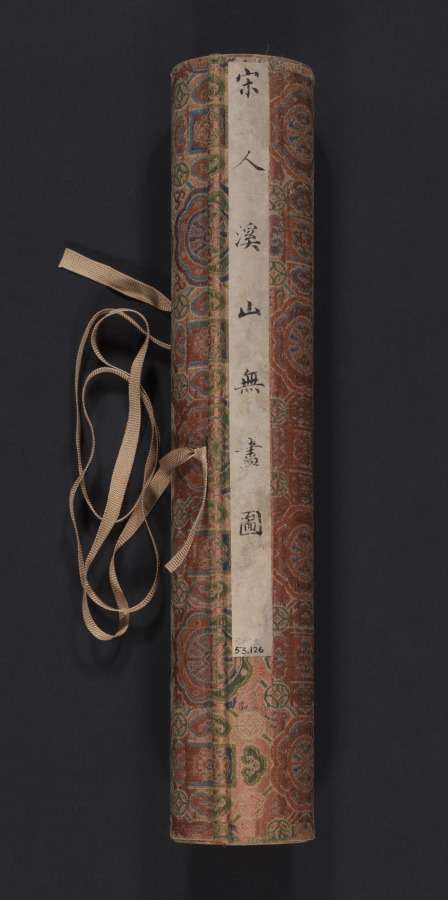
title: Streams and Mountains without End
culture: China, late Northern Song dynasty (960-1127) - Jin dynasty (1115-1234)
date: 1100–1150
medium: handscroll; ink and slight color on silk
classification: Painting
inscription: 9 colophons and 48 seals: 1 colophon, dated 1205, of Wang Wenwei 王文蔚 (dates unknown); 1 colophon, dated 1205, of Li Hui 李惠 (dates unknown); 1 colophon of Weiluo Tian Xie 蔚羅田獬 (dates unknown); 1 colophon, dated 1214, of He Yan 何言 (dates unknown); 1 colophon, dated 1326, of Cao Yuanyong 曹元用 (d. 1329) 1 colophon, dated 1332, of Kangli Zishan 康里子山 (Naonao; 1295-1345); 1 colophon, dated 1336, of Liu Zai 劉載. (dates unknown); 1 colophon, dated 1380, and 4 seals of Yang Mao 楊懋 (1300-after 1380); 4 seals of the Hou family (ca. 1340); 1 colophon of Wang Duo 王鐸 (1592-1652); 4 seals of Zhang Bingqian 張秉乾 (juren of 1729); 8 seals of Liang Qingbiao 梁清標 (1620-1691); 2 seals of the Qianlong emperor (r. 1736-95); 4 seals of the Jiaqing emperor (r. 1796-1820); 3 seals of the Xuantong emperor (r. 1909-11); 2 seals of Ye Gongchuo 葉恭綽 (1881-1968); 17 seals of Zhang Yuan 張爰 (Zhang Daqian 張大千, 1899-1983).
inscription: Colophon 1. Wang Wenwei 王文蔚. Dated third month and third day, 1205, under the reign of Zhangzong of the Jin dynasty. 造物元無心，山川秀氣聚。畫手亦無盡，各出新意度。 誰將妙林泉，淡墨寫縑素。重巒疊嶂間，三兩人家住。 茅舍隔素籬，小橋通細路。溪上數葉舟，雅有物外趣。 嵓崦藏招提，依稀認窗戶。山色四時宜，雲煙自朝暮。 不知塵世中，此景在何處。收拾買山錢，投老好歸去。 泰和乙丑三月三日平原王文蔚謹再拜，書于河東縣署之野趣堂。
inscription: Colophon 2. Li Hui 李惠. The colophon was written three days before the Qingming Festival in 1205. 畫師慣在山中居，含毫吮墨聊自娛。 閑將一段冰霜絹，寫出千里江山圖。 前山後山互出沒，山腰林樾相縈紆。 危橋澗溜瀉鳴玉，山根一匯為平湖。 波平短艇快漁釣，雲深細徑來樵蘇。 僊宮梵宇占幽勝，雕欄複閣森蓬壺。 往來行客煙靄外，飄飄野店青帘孤。 人家雞犬聲相接，熙熙化日安唐宇。 嗟余嗜好何其迂，膏肓泉石真吾徒。 一行作吏墮世網，薄書汨沒勞奔趨。 千巖萬壑但夢想，故園三徑應將蕪。 披圖暫洗黃塵眼，拊膺三嘆空踟躕。 泰和乙丑清明前三日絳臺李惠書于舜城府署之九思堂。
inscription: Colophon 3. Weiluo Tian Xie 蔚羅田獬. 畫工紛紛不可紀，擺脫俗流幾人耳。 夫誰援筆掃鵝溪，一段風煙且千里。 白波青嶂渺無窮，水接山兮山插水。 小橋野店相勾連，古寺樓臺突兀起。 飄然氣象與神俱，但患未明孰姓氏。 郭熙雖老典型存，為問主公無乃是。 此畫世希當寶藏，無與碌碌同一視。 更看卷首數公詩，奇絕清新相表裏。 蔚羅田獬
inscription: Colophon 4. He Yan 何言. Written in 1214. 萬有來自無，一真歸所託。畫師得三昧，胸中幻丘壑。 百態逐墨破，群形隨筆落。地近迹分明，天遙痕隱約。 雲物自吐吞，峯巒非斧鑿。江鄉閴無市，谷關常不鑰。 中有野夫閑，童琴而歩鶴。酒斾出籬懸，漁舟臨岸泊。 澗樹蔽橋樑，巖松迷殿閣。岑疊宿霧重，野曠林煙薄。 危棧接縈紆，亂泉通脈絡。途中人往來，僕馬何羸弱。 怪石虎踡跼，古木龍蟠錯。一幅宜好收，千金非易博。 玉堂閑卷舒，眼界增寥廓。視險尚寛平，見危除慘虐。 氣象溢國華，川澤資廟略。功名業已書，歸去鞭先著。 但知色即空，何是今非昨。飽乎仁智心，箇中無限樂。 貞祐甲戌秋暮，東營何言題。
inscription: Colophon 5. Cao Yuanyong 曹元用 (d. 1329). Dated 1326. 岸擁危橋斷，溪浮小艇斜。 萬山最深處，依約兩三家。 泰定丙寅秋，曹元用題。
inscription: Colophon 6. Kangli Zishan 康里子山 (i.e., Kangli Naonao). The colophon bears a date of 1332. 右溪山圖，意韻蕭灑。一見使人有烟霞之想，真可珍藏。又有□金諸名勝題詩其左。兵火之餘， 殊不易得也。 至順三年暮春之月，康里子山跋。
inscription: Colophon 7. Liu Zai 劉載. 雲拂埜田閑種玉，雨餘巖溜碎傾金。 幾時也結團茆去，麟閤恬然不挂心。 至元二年正月，長安劉載載之謹錄上。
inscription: Colophon 8. Yang Mao 楊懋 (1300–after 1380). 觀此圖，經營位置，筆法高古，山明石潤。其橋梁、路道、樹林、人物、遠近；一一誠得真山水之深趣。非當時名筆有大才者不能至此。不必問其誰何，可為神品。况宋金元三朝名公所跋，尚不能記，想其來尤遠矣。然而物經累變而尚存，是物之有壽者也。余不復再論。文顯其保之。洪武庚申春，八十翁楊懋觀。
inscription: Colophon 9. Wang Duo 王鐸 (1592–1652). 文蓀親翁博雅，文詩鴻暢。舍弟持此喜觀，遂抽管題數語： 山勢委折，筆墨無痕。宋人中如此不多見也。譬之兵家，當是韓白。王鐸。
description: Streams and Mountains without End was a landmark acquisition of 1953, made just a year after Sherman Lee had returned to Cleveland as curator of Oriental art. He acquired it with the intention to provide "a more than adequate foundation for a fine collection of Chinese landscape painting." This impressive work demonstrates the culmination of stylistic developments in Chinese monumental landscape painting following the Northern Song tradition. It represents a journey through a landscape, making it a fitting metaphor for Lee’s journey of discovery and achievement over a lifetime.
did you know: The portrayal of the distant lands is rich with details like pavilions, villages, and human activities.